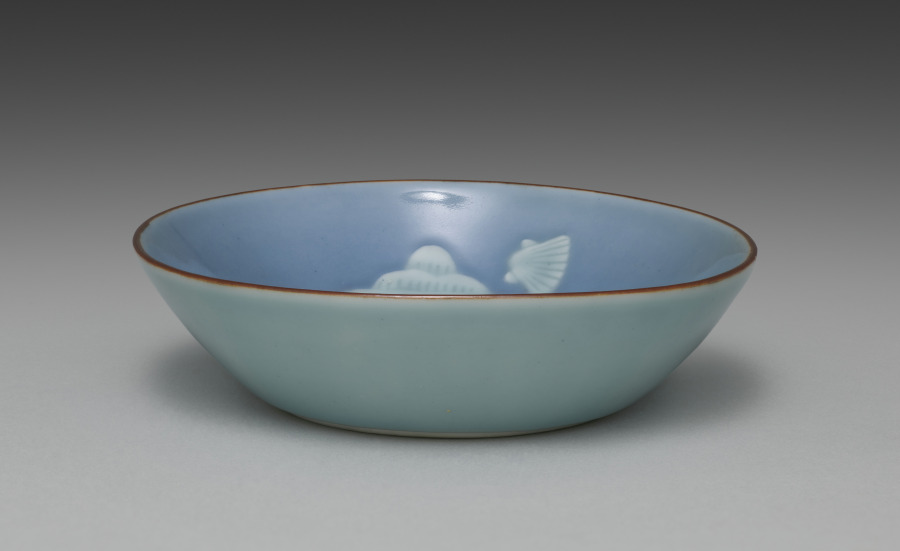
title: Dish from Dishes with Shells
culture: Japan, Taishō period (1912–26)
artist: Seifū Yohei IV (Japanese, 1872–1951)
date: 1914–46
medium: One from a set of five dishes; porcelain with blue glaze, iron oxide, and molded design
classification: Ceramic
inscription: 清風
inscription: 清風造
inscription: 清風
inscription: 成山清風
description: Yohei IV chose an aquatic theme for this set of five mukōzuke, side dishes. He added an iron oxide rim and used a concentrated blue glaze on both the interior and exterior. The glaze, named on the box lid, is his father’s “evening moon” (tsukiyoi) color. The conch in relief takes up the entire bottom of the dish. Up the sides are two snails on one end and on the other a scallop. This results in a boldly graphic, less realistic effect.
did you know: This set of dishes, mukōzuke, could be used for serving small side dishes at a tea gathering.